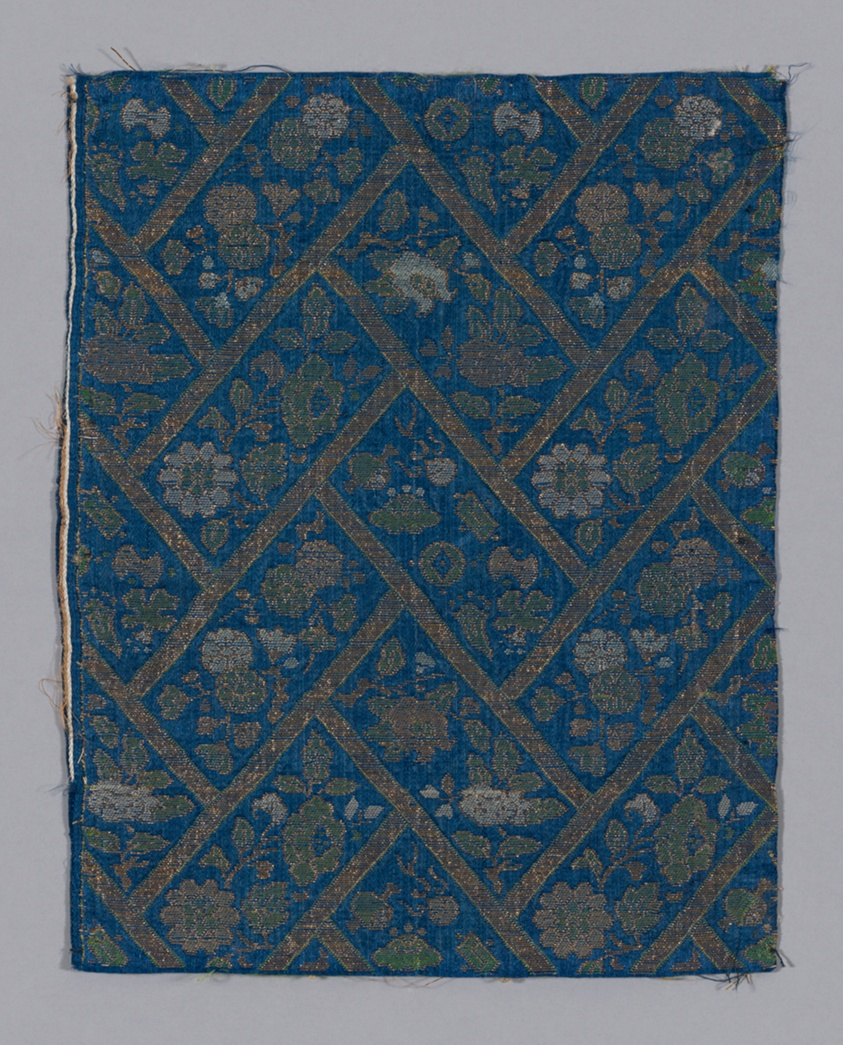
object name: Textile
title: Fragment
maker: Japan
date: 1750/1800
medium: Plain compound (or brocaded) satin, silk and gilt paper; 2 strips to m.m.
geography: Japan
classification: weaving; textile